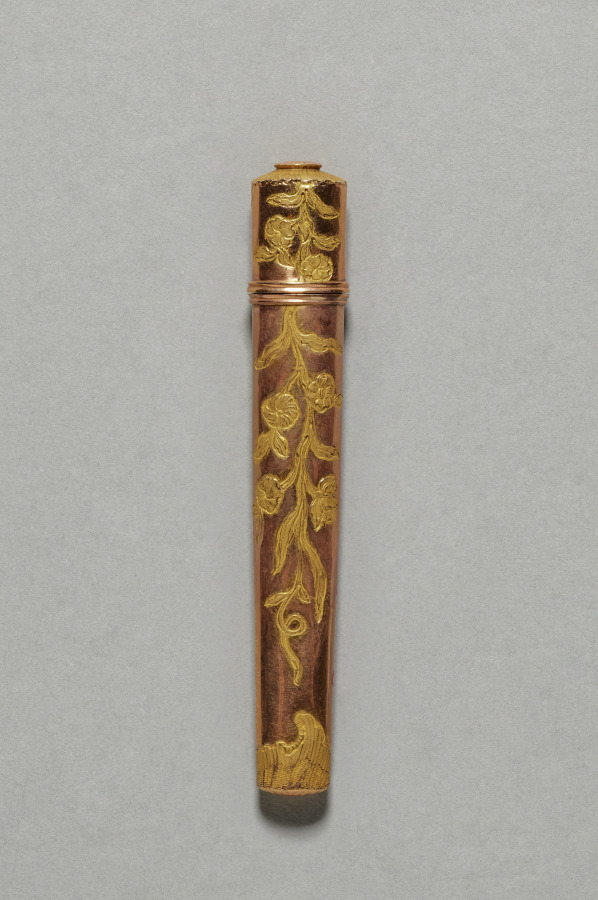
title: Needle Case from a Sewing Box (Nécessaire)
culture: Austria, possibly Vienna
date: c. 1765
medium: gold and mother-of-pearl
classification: Miscellaneous